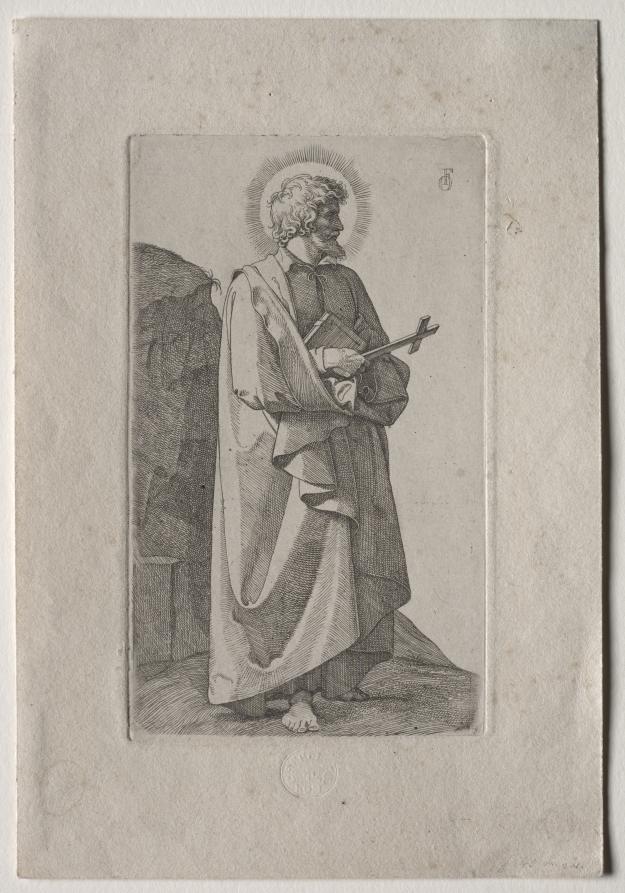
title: St. Philip Neri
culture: Germany, 19th century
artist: Johann Friedrich Overbeck (German, 1789–1869)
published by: Carl Schulze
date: 1826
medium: etching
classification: Print